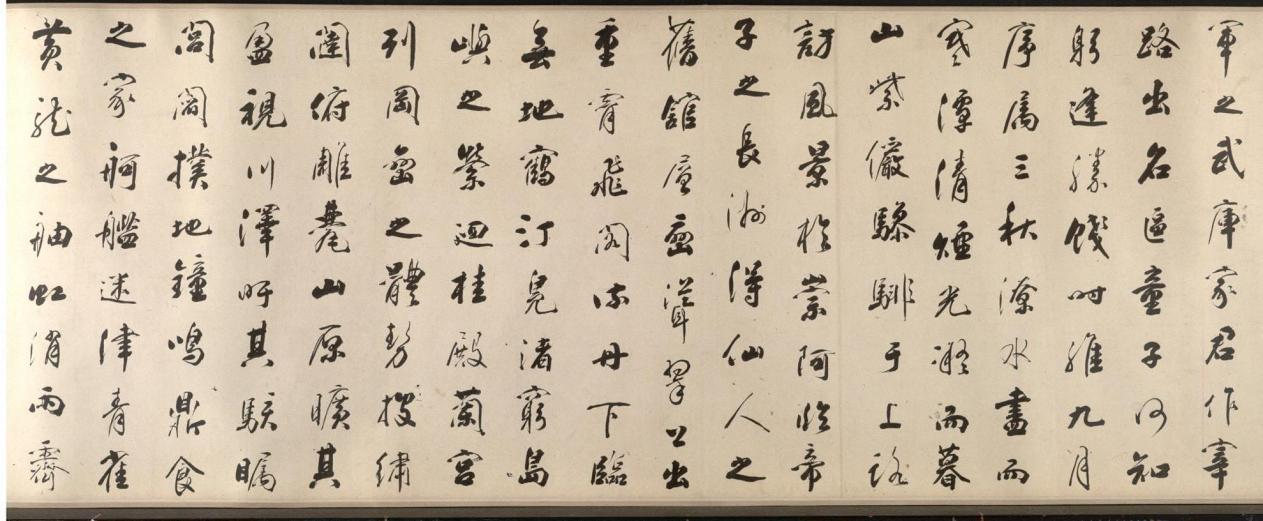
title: Calligraphy in Running Style based on Wang Bo's Essay on Tengwang Pavilion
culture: China, Changbai, Qing dynasty (1644-1911)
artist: Tiebao (Chinese, 1752–1824)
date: 1811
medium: handscroll, ink on paper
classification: Calligraphy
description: A member of the Donggo clan, Tiebao belonged to the Manchu Plain Yellow Banner army. As an official in the Qing court, he endured considerable vicissitude and his career was never smooth. Celebrated as a man of letters, he oversaw the publications of the Manchu military system as well as an anthology of poems by members of the imperial family and other Manchu dignitaries. In calligraphy, he was regarded as the equal of such eighteenth-century luminaries as Liu Yong (1720-1805) and Weng Fanggang (1733-1818). This handscroll is a work of his mature years and is exemplary of his disciplined and highly subtle approach to the art of calligraphy.